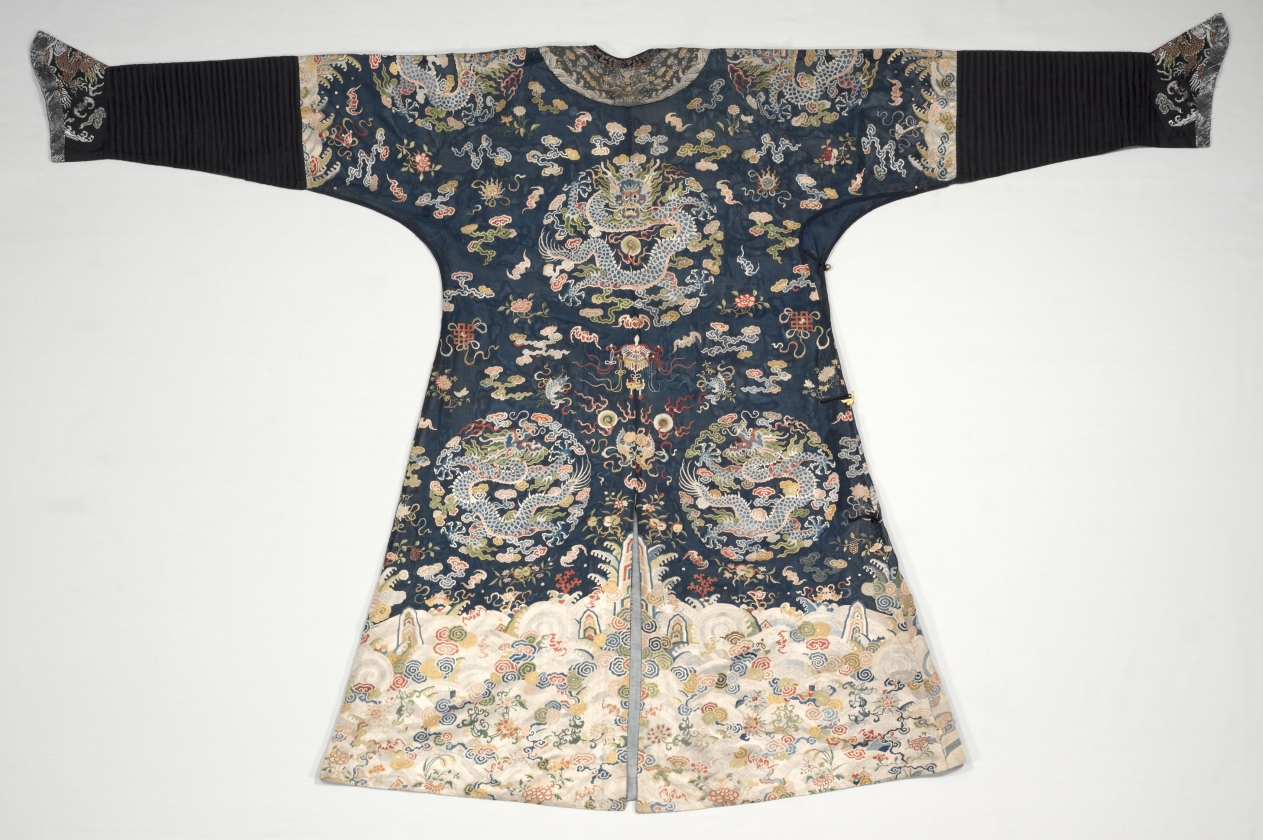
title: Mandarin Robe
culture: China, Qing dynasty (1644-1911)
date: late 1700s-early 1800s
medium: Silk; gauze weave, embroidery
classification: Garment